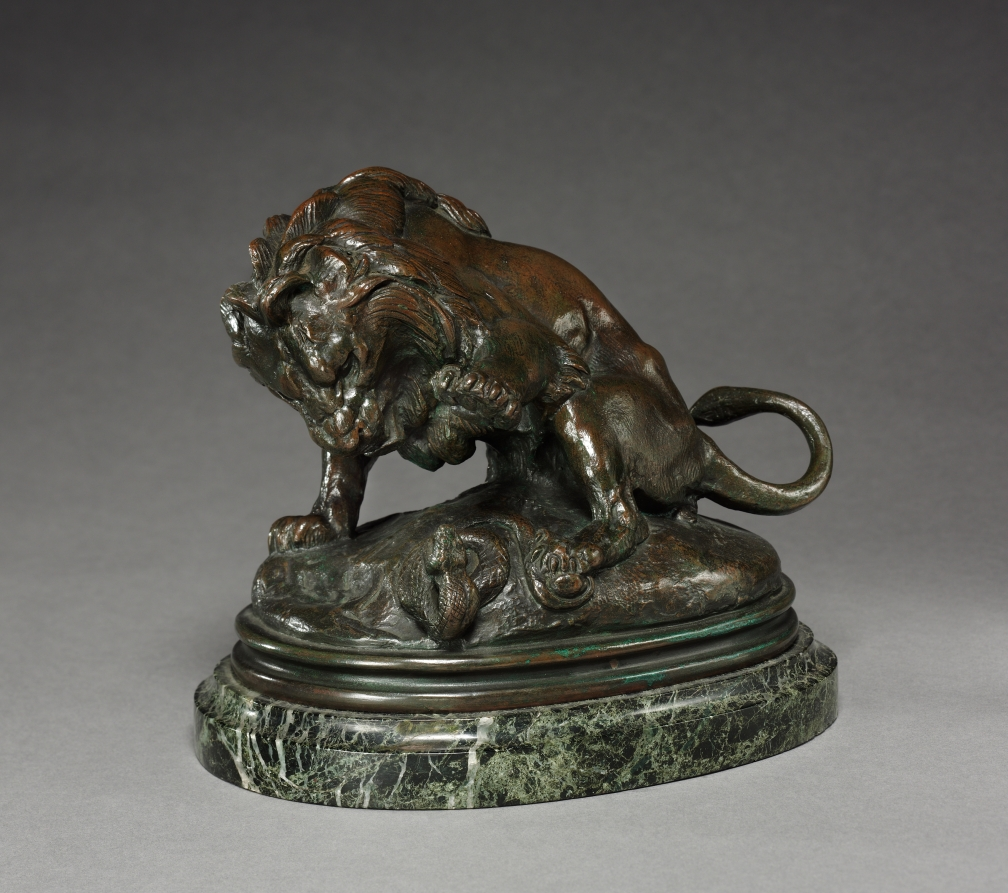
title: Lion and Serpent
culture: France, 19th century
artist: Antoine-Louis Barye (French, 1796–1875)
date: c. 1830 – 1875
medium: bronze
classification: Sculpture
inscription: Signed: "Barye"